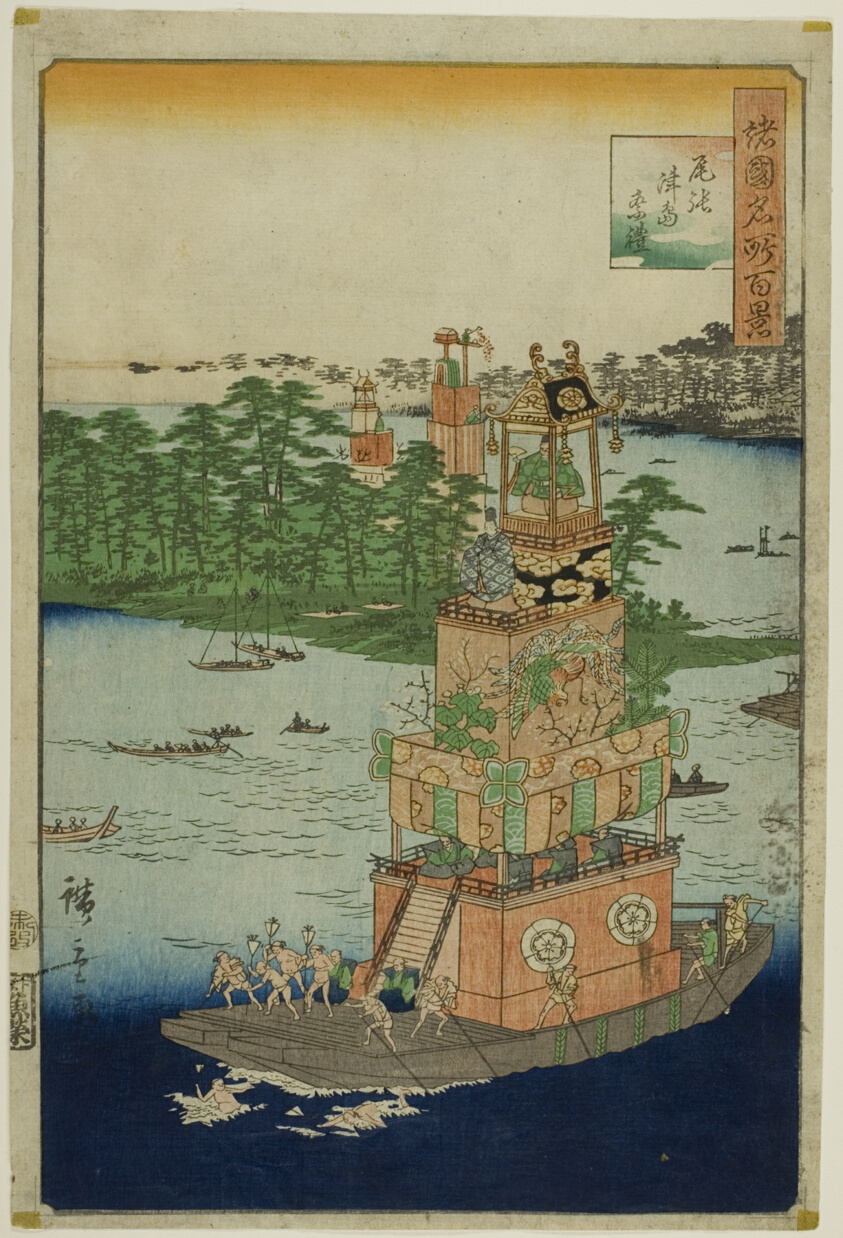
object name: Print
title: The Tsushima Festival, Owari Province (Owari Tsushima sairei), from the series “One Hundred Famous Views in the Various Provinces (Shokoku meisho hyakkei)”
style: Japanese (culture or style)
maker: Utagawa Hiroshige II (Shigenobu) (Japanese, 1826–1869)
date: 1859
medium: Color woodblock print; oban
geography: Japan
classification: woodblock print; print